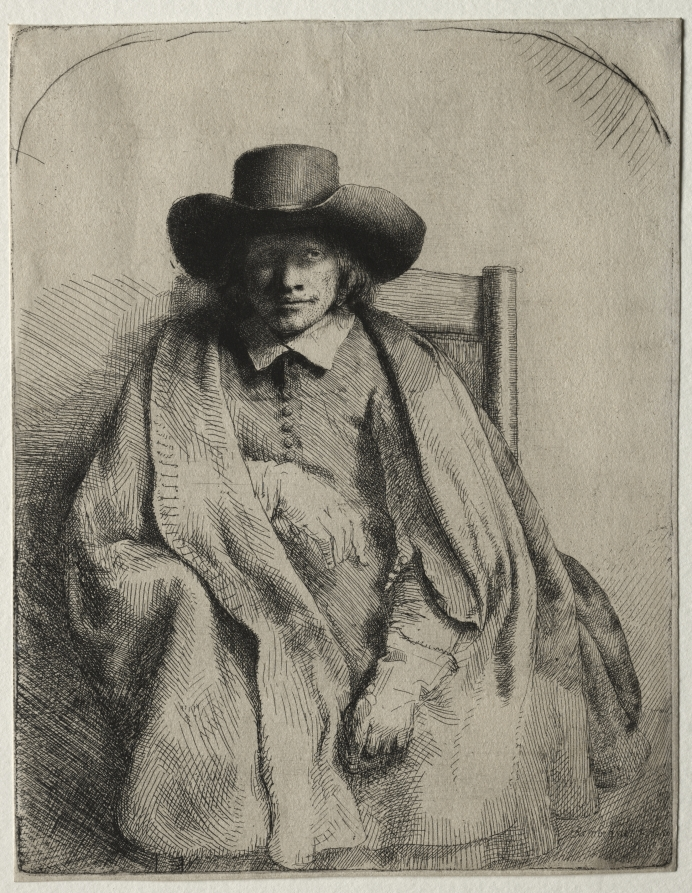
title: Clement de Jonghe, Printseller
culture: Netherlands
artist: Rembrandt van Rijn (Dutch, 1606–1669)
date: 1651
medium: etching, drypoint, and engraving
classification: Print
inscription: lower right, in plate: Rembrandt f. 1651; VERSO, upper center, in graphite: 550 ; lower left, in graphite: 53 ; lower left, in pen and brown ink: D.D. / 90 ; lower left, in graphite: MK 04310 ; lower center, in graphite: B. 272 III / H. 251 III ; by Richard Zinser, lower right, in graphite: Moscardo / vol.